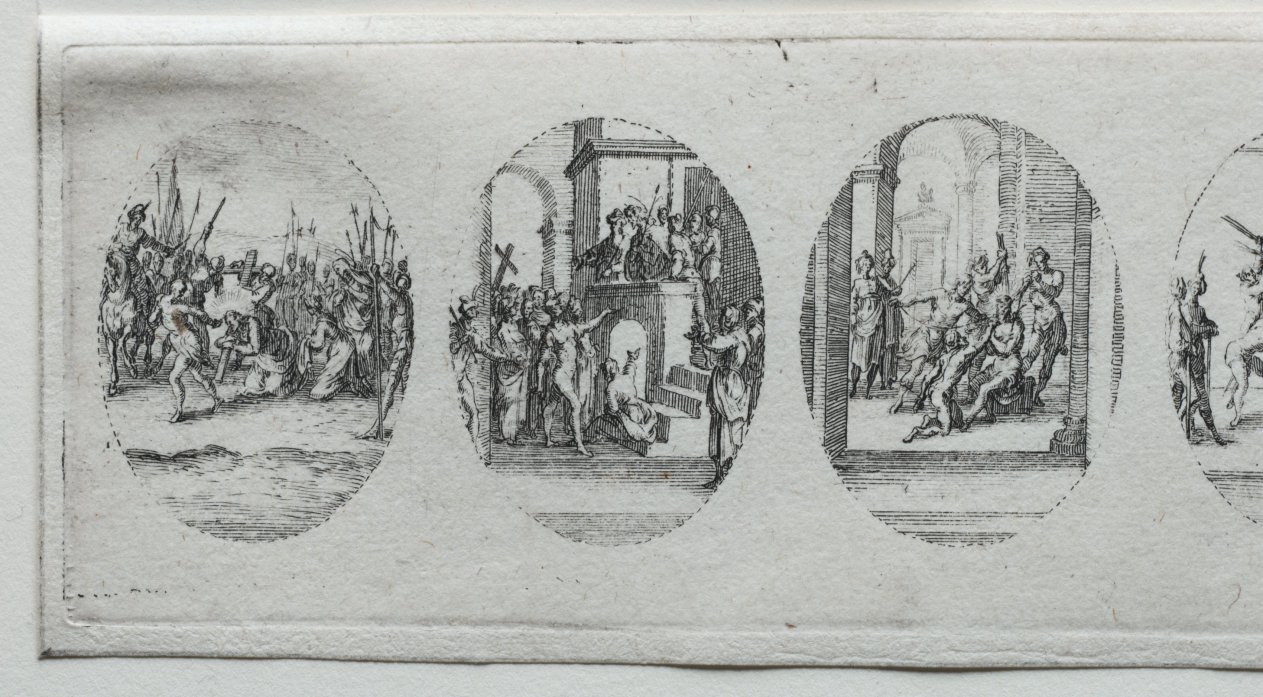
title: The Mysteries of the Passion: Christ Crowned with Thorns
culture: France, 17th century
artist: Jacques Callot (French, 1592–1635)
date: 1631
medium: etching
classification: Print